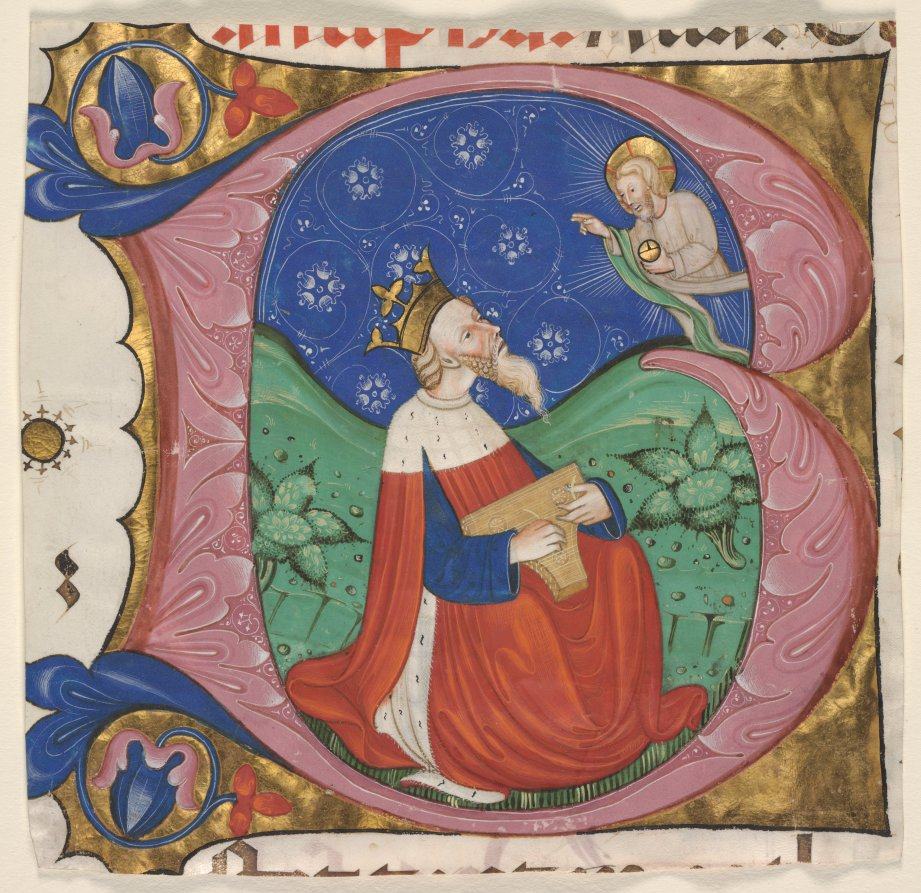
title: Initial "B" (eatus Vir) from a Choir Psalter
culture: Italy, 15th century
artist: Master of the 'Vitae Imperatorum' (Italian)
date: c. 1430–1450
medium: ink, tempera and gold leaf on vellum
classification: Illumination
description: This initial B, introducing the first psalm, Beatus vir, represents King David who is shown here playing a psaltery, a stringed instrument consisting of a shallow box that is plucked, instead of his more traditional harp. The psaltery was widely popular in Europe during the 14th and 15th centuries. The illuminator of this striking initial is named after his earliest dated work, an illuminated volume of Suetonius’s Vitae Imperatorum (Lives of the Emperors), which he decorated in 1431 for Filippo Maria Visconti, Duke of Milan (1412–47). He is noteworthy for his distinctive use of line and color.